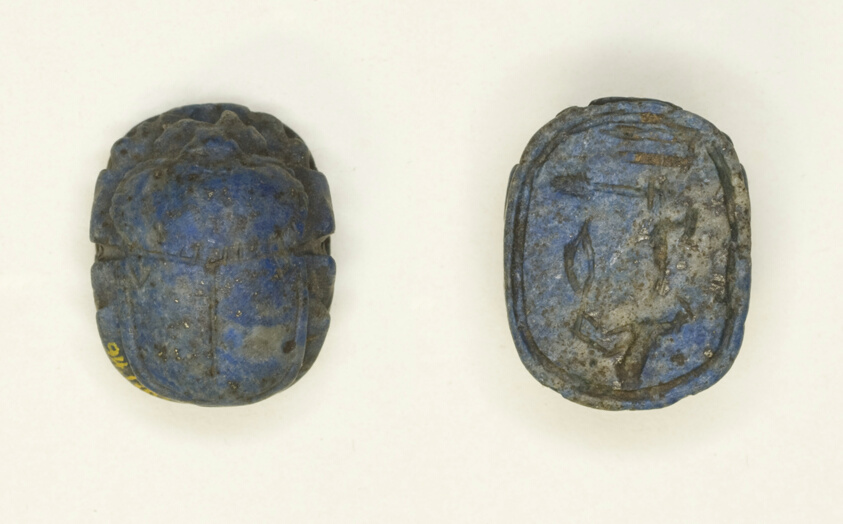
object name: Costume and Accessories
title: Scarab with Hieroglyphs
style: third intermediate period, egyptian, ancient, late period (egyptian)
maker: Egyptian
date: Third Intermediate Period-Late Period, Dynasty 21–26 (about 1069–525 BCE)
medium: Lapis lazuli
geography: Egypt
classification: scarab; ancient art; costume; seal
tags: insects, Hieroglyphs